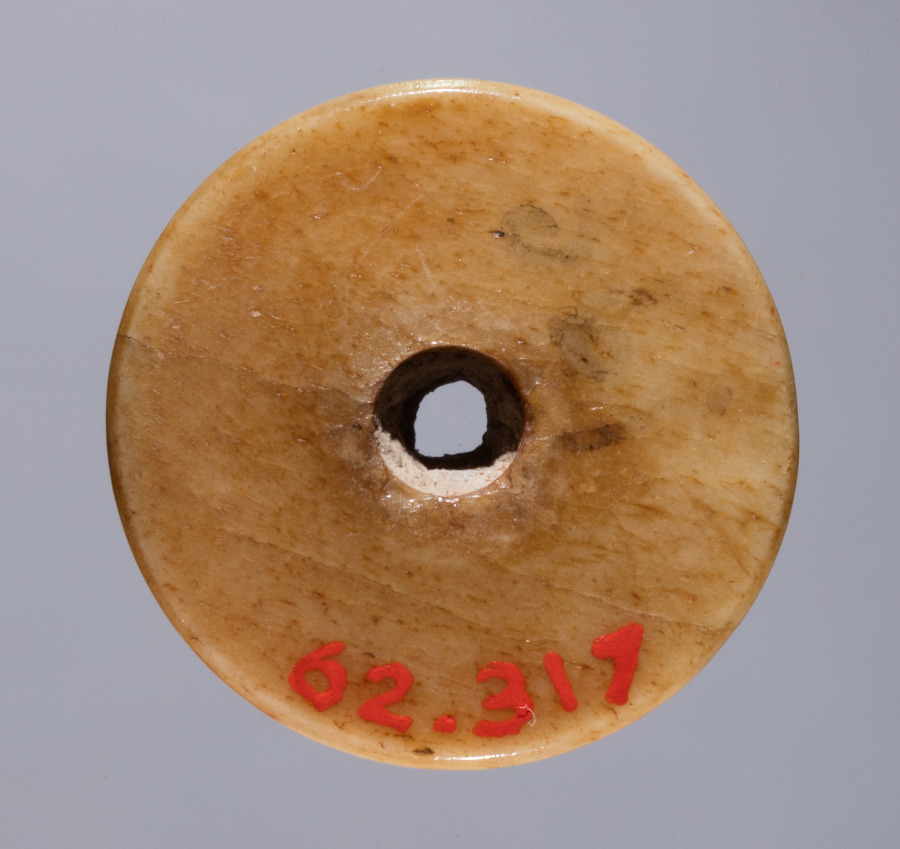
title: Spindle Whorl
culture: Iran, early Islamic period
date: 700s - 900s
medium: bone, incised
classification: Spindle Whorl